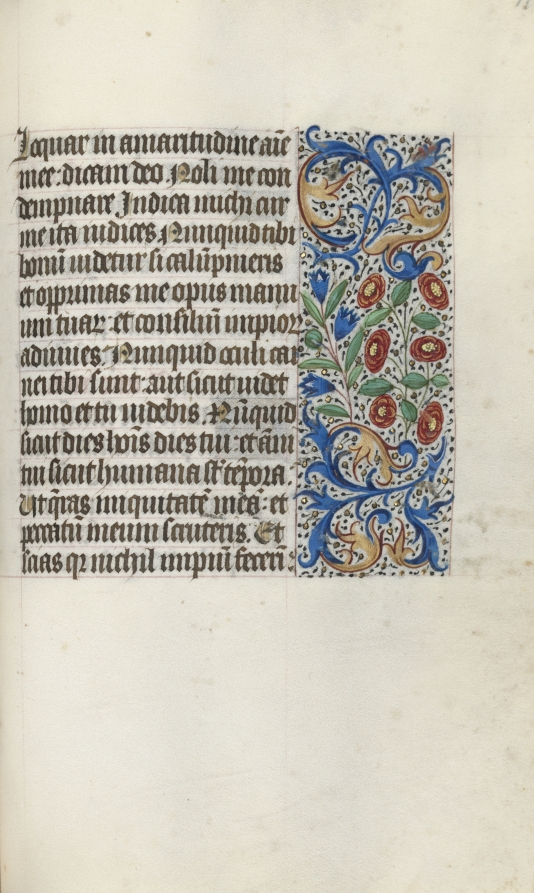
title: Book of Hours (Use of Rouen): fol. 116r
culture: France, Rouen, 15th century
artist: Master of the Geneva Latini (French, active Rouen, 1460–80)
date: c. 1470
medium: ink, tempera, and gold on vellum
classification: Bound Volume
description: In the late 1400s and early 1500s Rouen was an established and important center of book production. The city’s cathedral had a wealthy chapter that spent large sums of money to commission books and to maintain its extensive library. The stationers and booksellers would have likely been concentrated in or near the cathedral precinct. This artist, named after a manuscript now in Geneva, was Rouen’s principal illuminator during the second half of the 1400s.